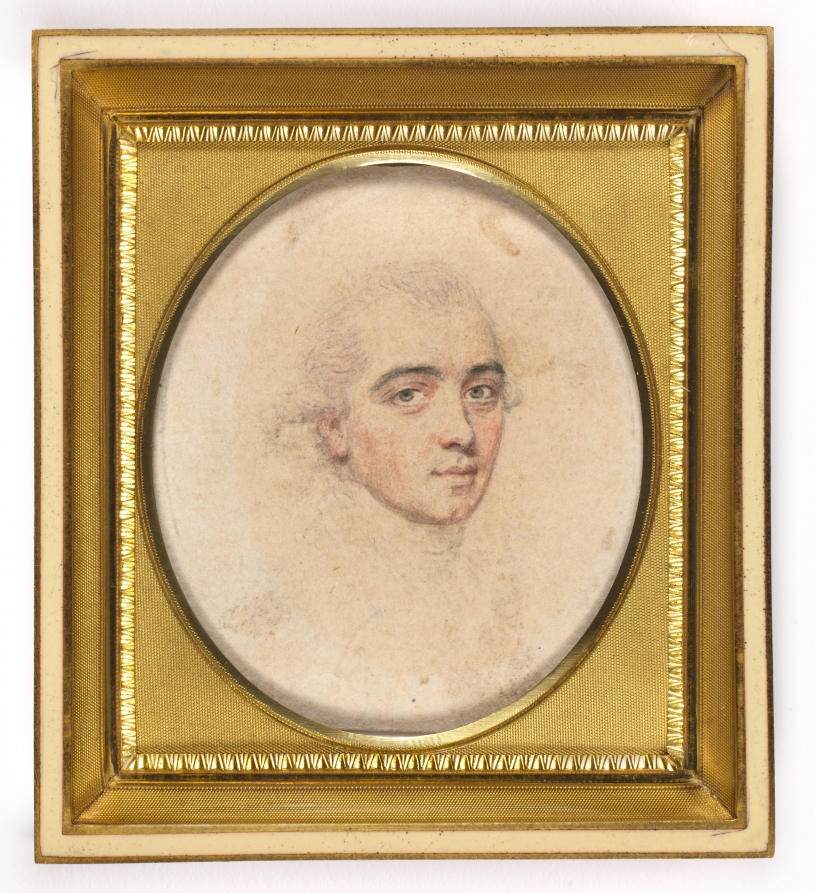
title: Portrait of M. de Viapre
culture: England, 18th century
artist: John I Smart (British, 1741–1811)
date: c. 1776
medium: graphite and wash on laid paper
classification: Portrait Miniature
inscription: Signature: none; inscribed on paper backing in graphite, upside down at upper left: 196; also on paper backing on slant at center, in graphite: Sir ?/John/Lester and 11; inscribed on back of drawing, under paper backing in graphite at bottom: Mr De [G?]iaf . . .; and in brown ink from top to bottom: Scarlet Coat . . . der Bottom [or possibly button]. . . green waistcoat . . . racelet & Spring [deli]vrd to Mr. Hall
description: Although it is impossible to say if it was always part of the artist’s process to execute a preparatory sketch prior to painting each miniature, we do know that John Smart retained many hundreds of these sketches. A group of preparatory sketches—of which this portrait is one—descended through the Smirke family after Smart’s daughter Sarah gave a sketchbook containing preparatory portrait studies to her friend Mary Smirke, sister of the celebrated Victorian architect Sydney Smirke. This book was probably broken up around 1877 when it was divided between Sydney’s daughters Mary Jemmett and Mrs. Lange, whose portions were both sold at auction in 1928. G. C. Williamson was the first to suggest that Smart’s sketches were well known and that they were preparatory studies for the painted miniatures. Williamson listed the names of sitters from the sketches known to him at the time, and they include Sir John Lester, the title formerly given to the sketch here. This designation was applied only to a paper backing that had been attached after the drawing had been removed from the sketchbook. There is no further evidence for this attribution, however. This sketch presents only the sitter’s head, with a slight suggestion of a high stock collar. His head faces to the left, and his light hair is combed straight back with a flat curl above the right ear. He has gray eyes, and the background is unpainted. The work can be dated to around 1776 because of its size, which, when painted on ivory, would have been around 2 inches high. An inscription on the back of the drawing was discovered when the paper backing was removed in 1993. It is a fragment of a larger inscription, from which it has been cut. It is partly illegible but suggests that the work was intended to be set in a bracelet, and it gives some information about how the sitter was to appear in the finished miniature, including the description “scarlet coat . . . green waistcoat.” This combination of colors might seem almost flashy, but it appears elsewhere in Smart’s work. These details seem to have been written in Smart’s hand, while the graphite inscription below—“Mr. De [?]”—was probably written later in another hand. Miniatures expert Arthur Jaffé remarked in 1948 that this portrait probably depicted John Lester of Poole, Dorset, who was knighted in 1802. However, this identity was based solely on the inscription on the later paper backing that Jaffé did not have the opportunity to see removed to reveal the inscription in Smart’s hand on the back of the drawing itself. There are no portraits of Sir John Lester known, and to this date, the finished ivory for which this preparatory sketch was presumably undertaken has not been discovered.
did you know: Sketches helped John Smart work out the particulars of a portrait before commencing the miniature on ivory; they were useful in the event that a duplicate might later be required.